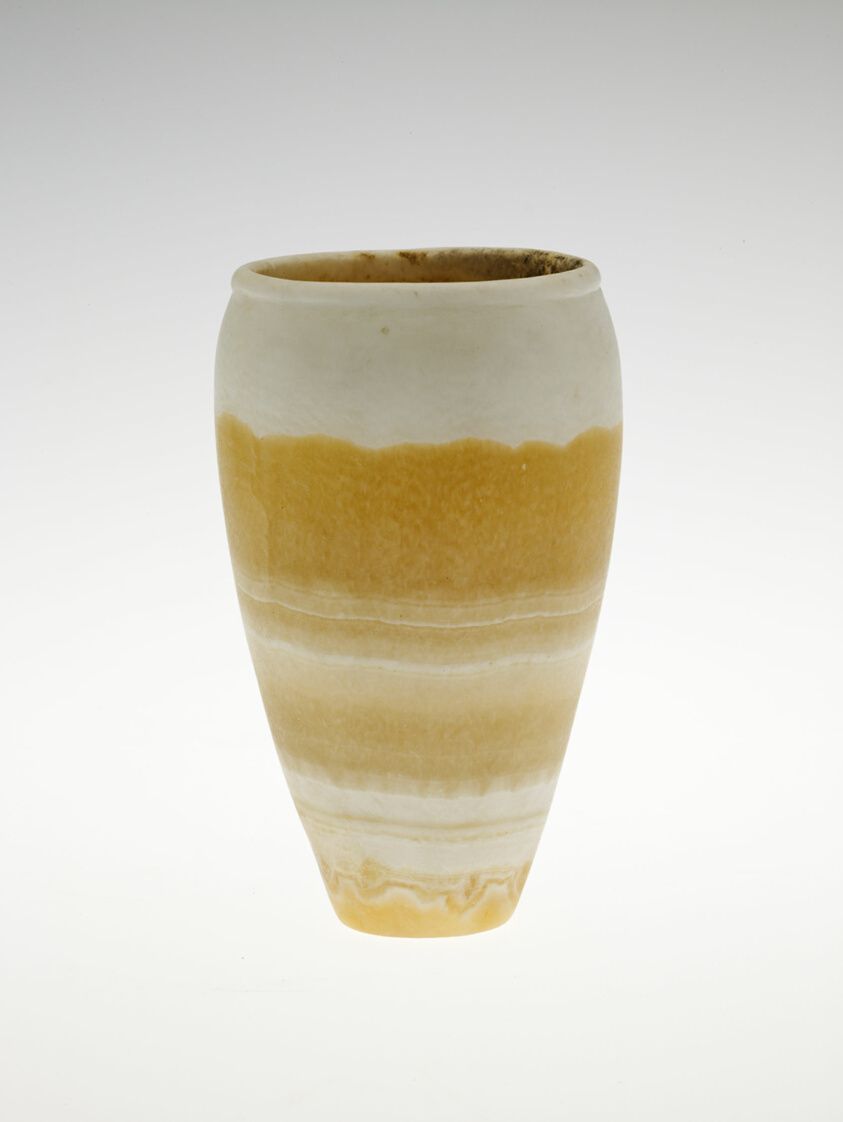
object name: Vessel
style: egyptian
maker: Egyptian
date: Archaic Period–Old Kingdom, Dynasty 1–3 (about 3050–2630 BCE)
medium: Alabaster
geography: Egypt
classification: vessel; stone; ancient art